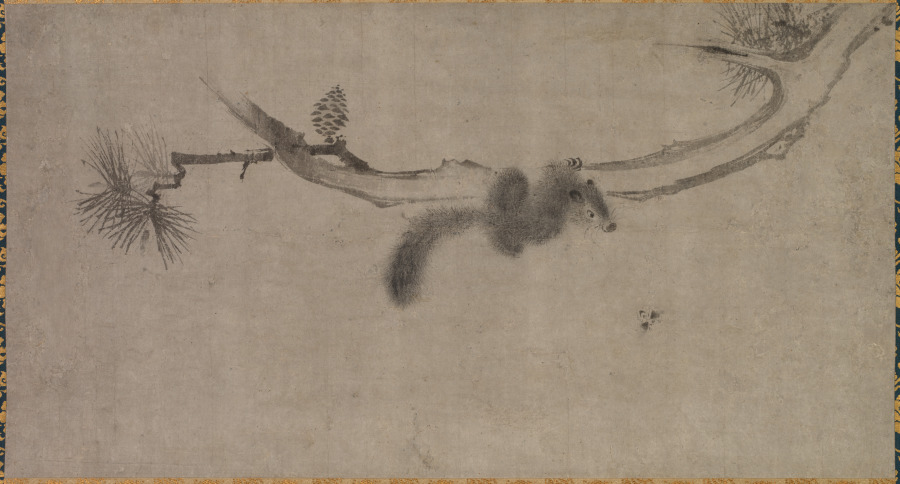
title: Squirrel on a Pine Branch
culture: China, Ming dynasty (1368–1644)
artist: Song Tian (Chinese, active 1300s)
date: 1500s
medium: hanging scroll, ink on paper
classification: Painting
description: This painting captures a squirrel in action, distracted and twisting its head while climbing and looking at a little bug to the right. The painter skillfully employs a combination of ink washes and fine brushstrokes to simulate the animal’s fur. Only three simple curved lines depict the squirrel’s claws. The subject of squirrels did not appear in Chinese painting before the late Southern Song (1127–1279) and Yuan periods (1279–1368). The painter Songtian was one of the few Yuan painters who specialized in this theme.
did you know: Although the evergreen pine does not indicate a time of year, the lively activity of the squirrel and the insect suggest a warm season.